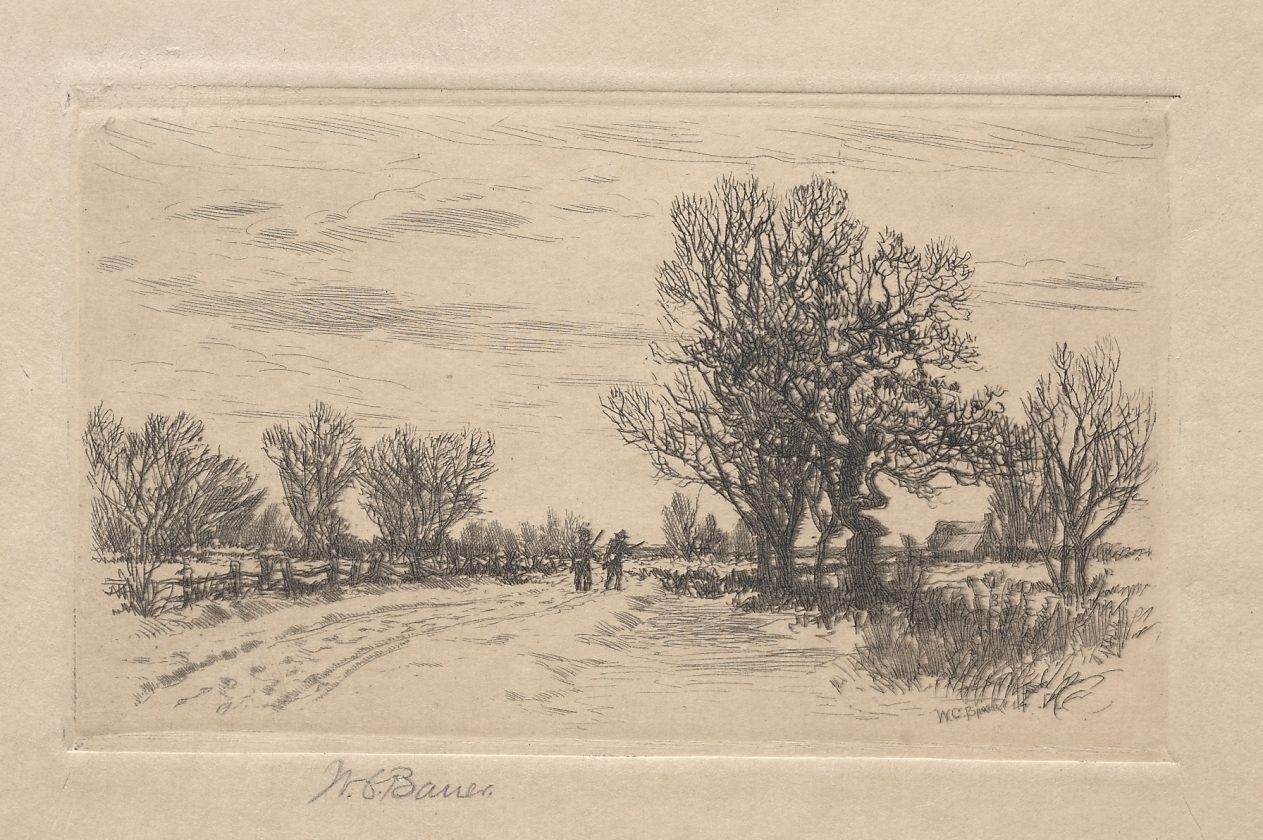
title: Landscape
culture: America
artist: William C. Bauer (American, 1888-)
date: 20th century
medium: drypoint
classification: Print